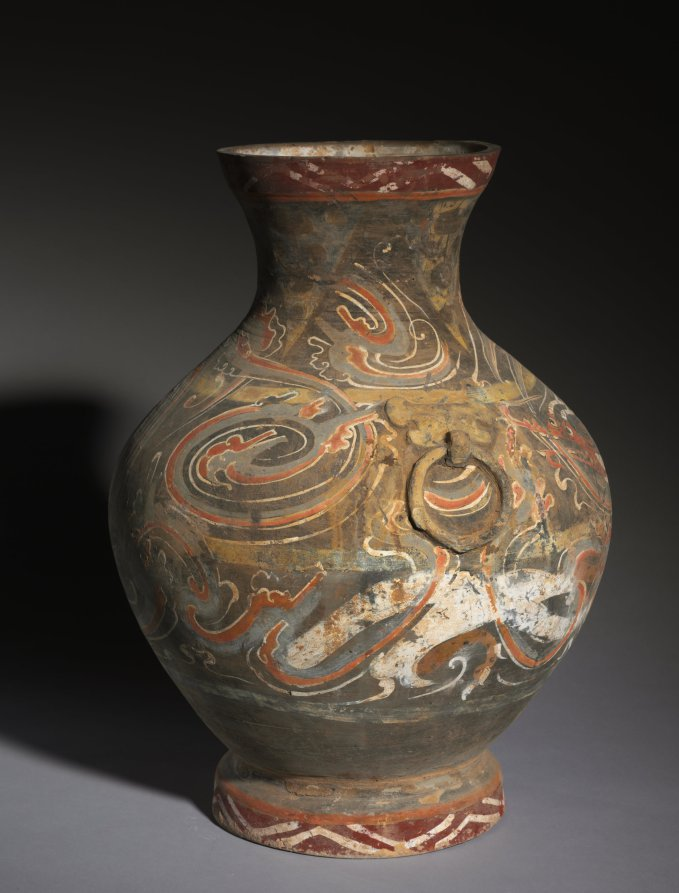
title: Jar (Hu)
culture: China, probably Henan province, Western Han dynasty (206 BCE–8 CE)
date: 202 BCE–9 CE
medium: earthenware with slip and painted decoration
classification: Ceramic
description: Instead of depicting a real landscape, the artist focused on the rhythmic forces of nature and the movement of energy, using the scrolling form as a symbol common to all changes in nature: cloud vapors, waves, and mountains alike. Here a dragon hovers among sweeping scrolls.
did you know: This earthenware wine jar's shape mimics costly bronzes, but the handles have rings that are fixed to the surface of the pot, rendering them useless.